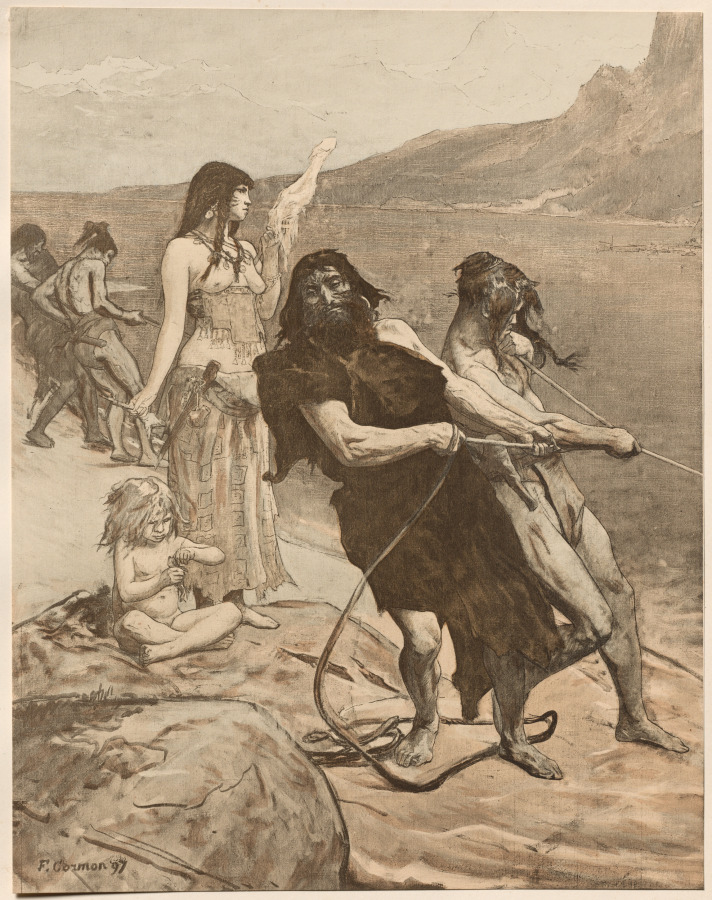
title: Cité Lacustre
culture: France, Paris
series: L'Estampe Moderne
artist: Fernand Cormon (French, 1845–1924)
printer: Imprimerie Champenois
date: 1897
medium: Color lithograph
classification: Bound Volume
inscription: lower right corner of secondary support: blindstamp of l'Estampe Moderne (Lugt 2790); lower left corner of image, printed: F. Cormon '97